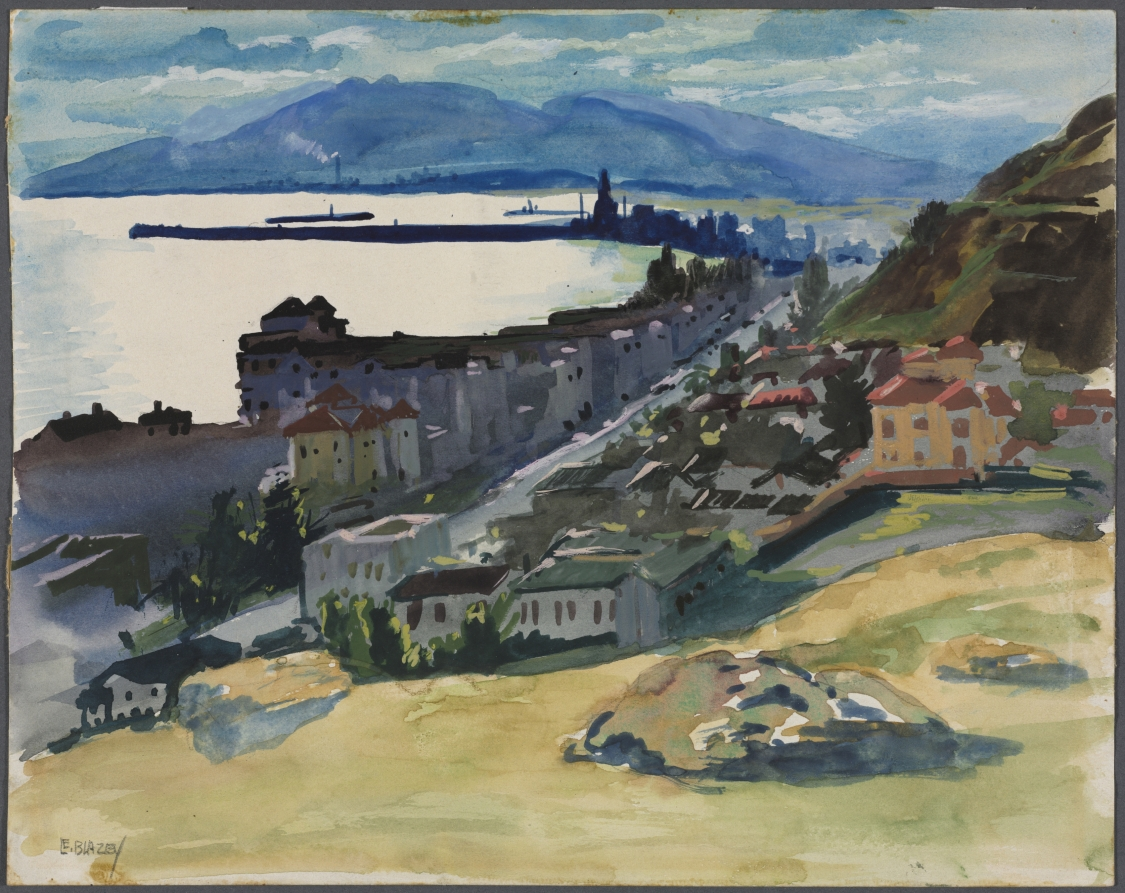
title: Malaga Harbor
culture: America, Ohio, Cleveland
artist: Lawrence Blazey (American, 1902–1999)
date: c. 1926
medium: watercolor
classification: Drawing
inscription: Signed lower right: "Le. Blazey. Painted c. 1926"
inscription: On verso, lower right: "Malaga Harbor/looking down Calle Sancha"